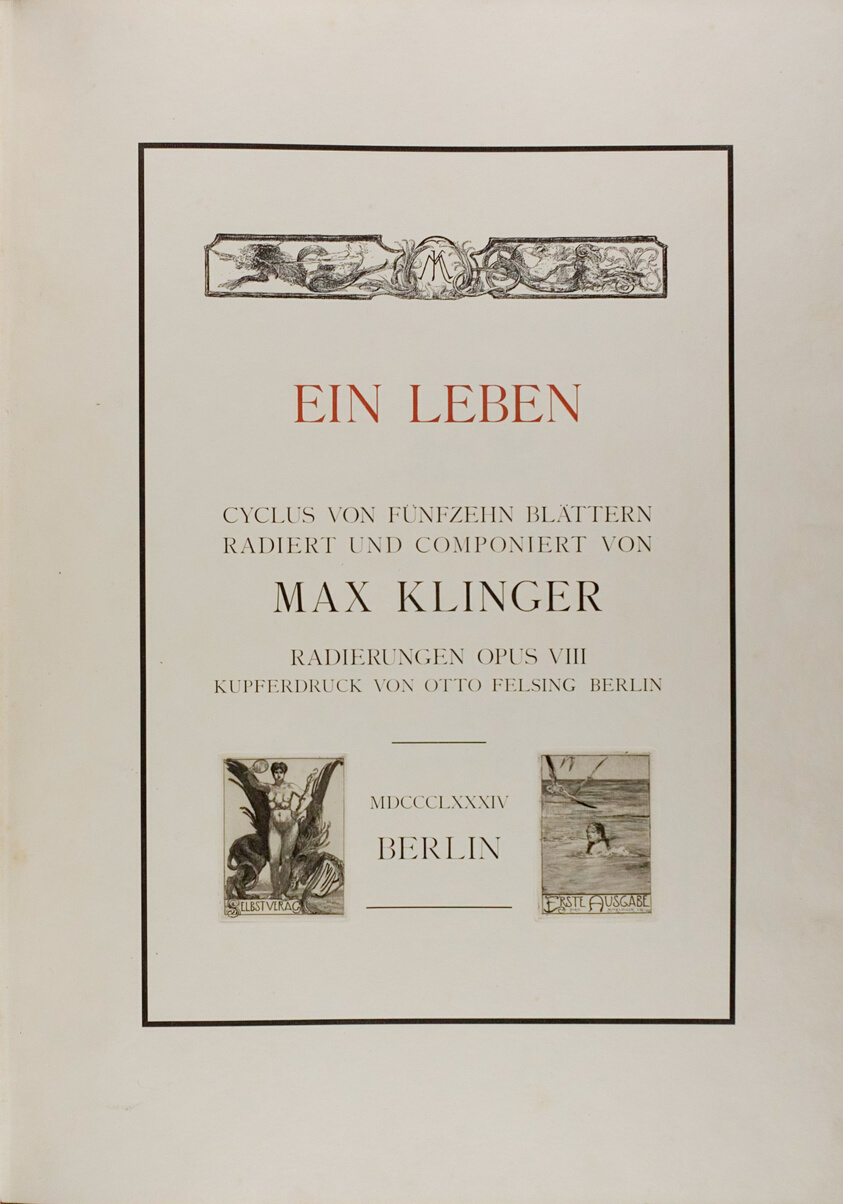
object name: Print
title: Title Page: A Life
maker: Max Klinger (German, 1857-1920); printed by Otto Felsing (German, 19th century)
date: 1884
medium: Two etchings on one sheet of cream laid paper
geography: Germany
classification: etching; print; prints and drawing